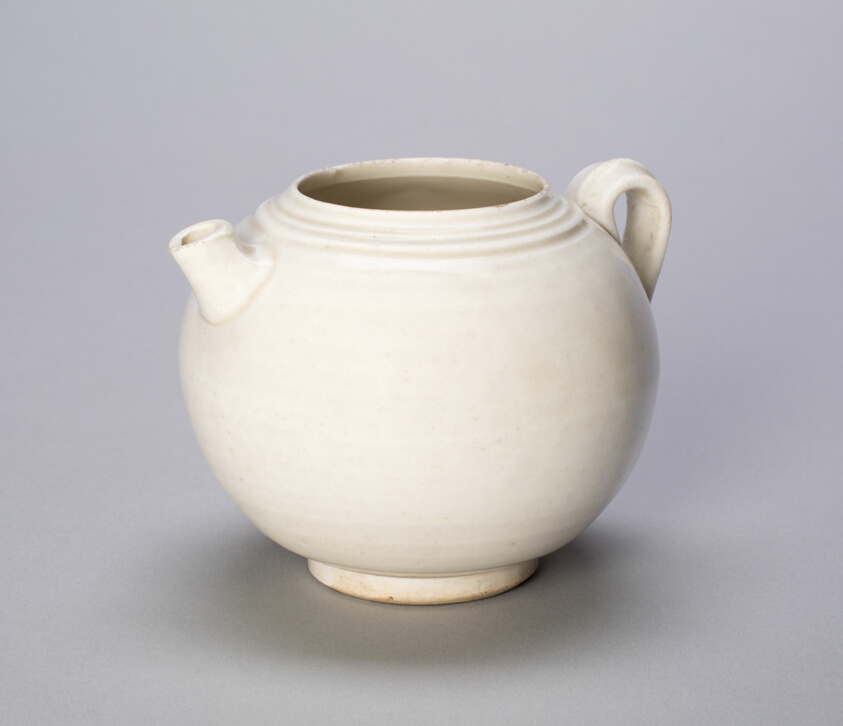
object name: Vessel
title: Globular Ewer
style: Chinese (culture or style)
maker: China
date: Five Dynasties period (907–960) or Northern Song dynasty (960–1127), c. 10th/11th century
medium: Ding-type ware; glazed porcelain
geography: China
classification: ewer (vessel); vessel; ceramics